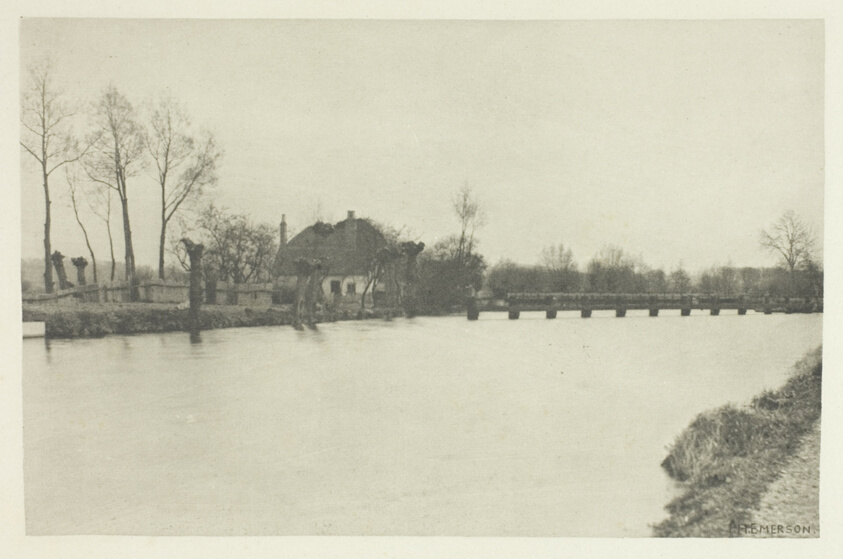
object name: Photograph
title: King's Weir, River Lea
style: 19th century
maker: Peter Henry Emerson (English, born Cuba, 1856–1936)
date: 1880s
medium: Photogravure, plate XXII from the album "The Compleat Angler or the Contemplative Man's Recreation, Volume II" (1888)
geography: England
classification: photogravure; photomechanical process; photography; photograph